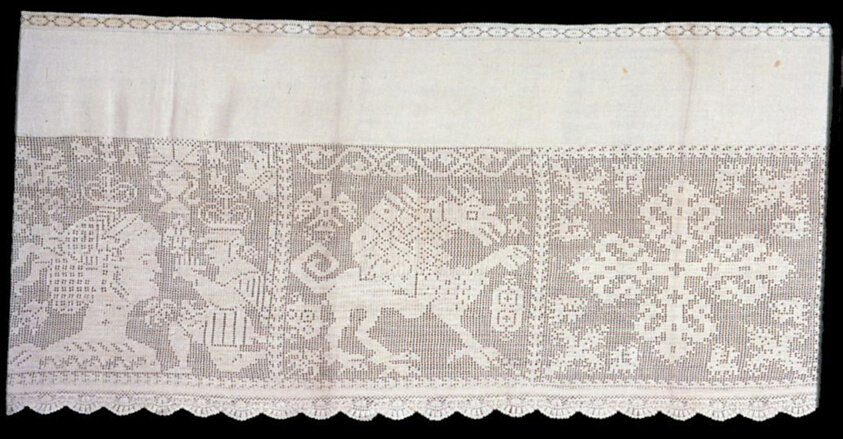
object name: Religious/Ritual Object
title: Altar Frontal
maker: Italy or Spain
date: 17th/18th century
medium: Linen, plain weave; cut and drawn work fillings of double hem, interlocking lace, overcast, and Russian overcast stitches; top and bottom edged of linen, bobbin straight lace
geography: Italy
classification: textile; needlework (visual works); liturgical; ritual objects